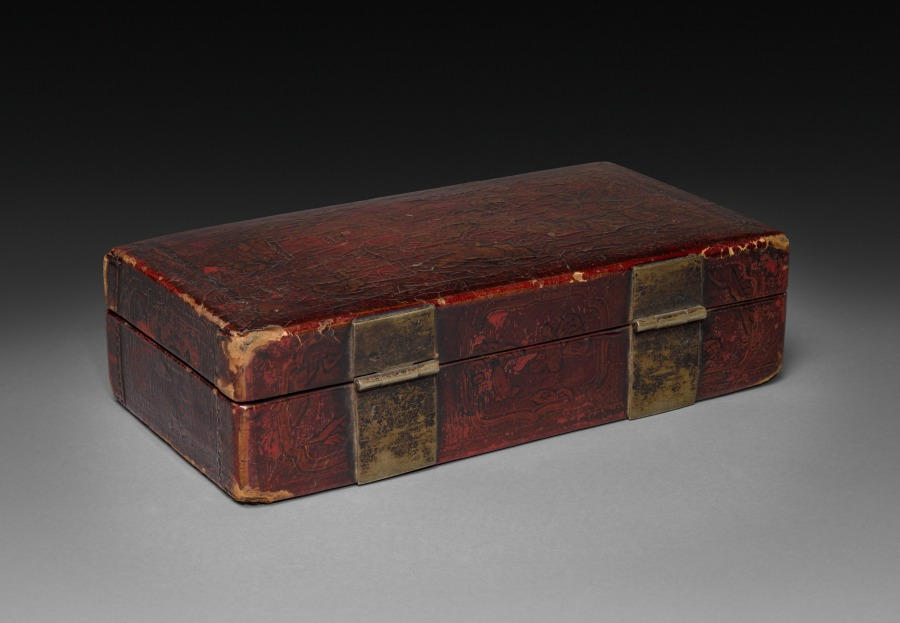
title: Box with Hinged Lid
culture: Japan, Edo period (1615–1868)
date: 1700s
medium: lacquer; metal hinges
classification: Lacquer